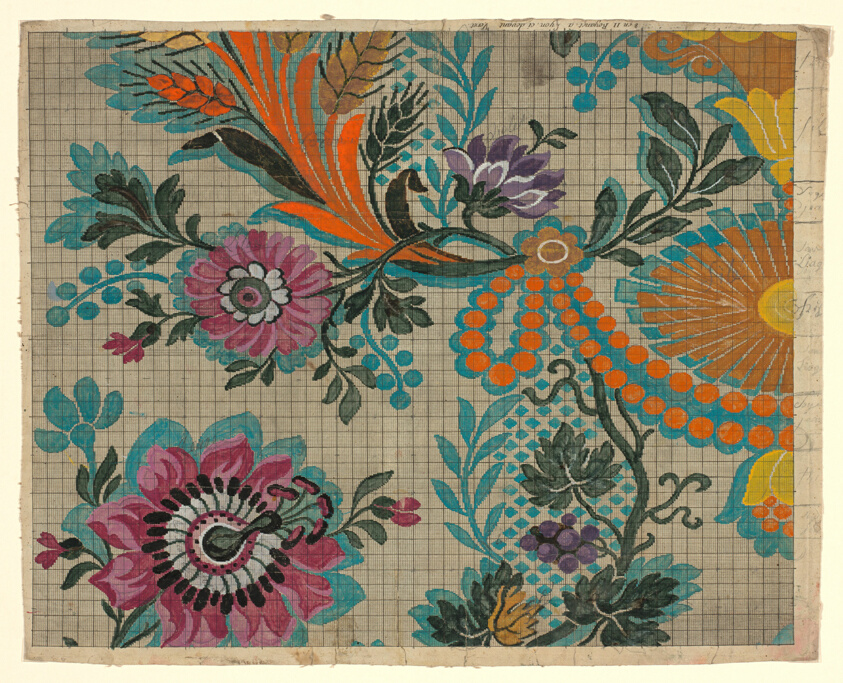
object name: Drawing and Watercolor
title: Mise-en-carte (Point-paper)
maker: France, Lyon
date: 1760/90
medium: Ink and gouache on hand drawn graph paper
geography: France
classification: textile; accessory - paper design